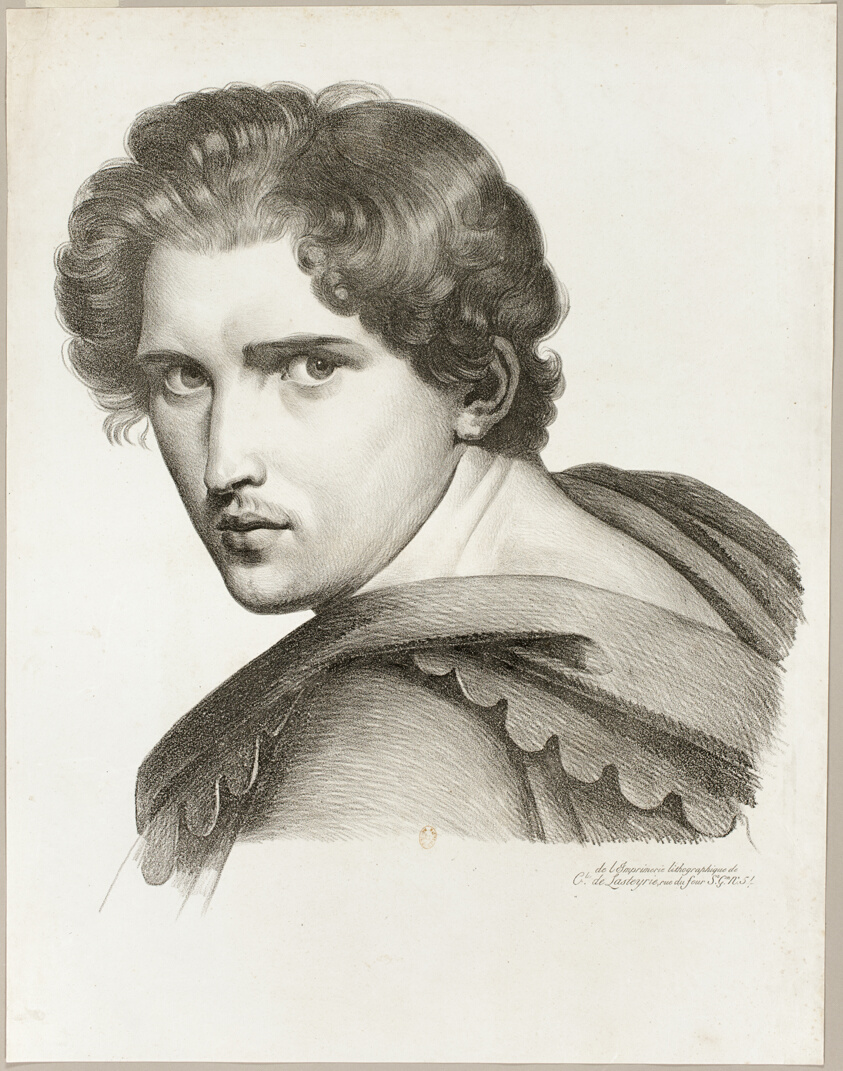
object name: Print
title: Expressive Head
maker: Artist unknown (French, early 19th century); printed by Comte de Charles Philibert Lasteyrie du Saillant (French, 1759-1849)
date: 1816/18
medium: Lithograph in black on ivory wove paper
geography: France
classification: lithograph; print; prints and drawing